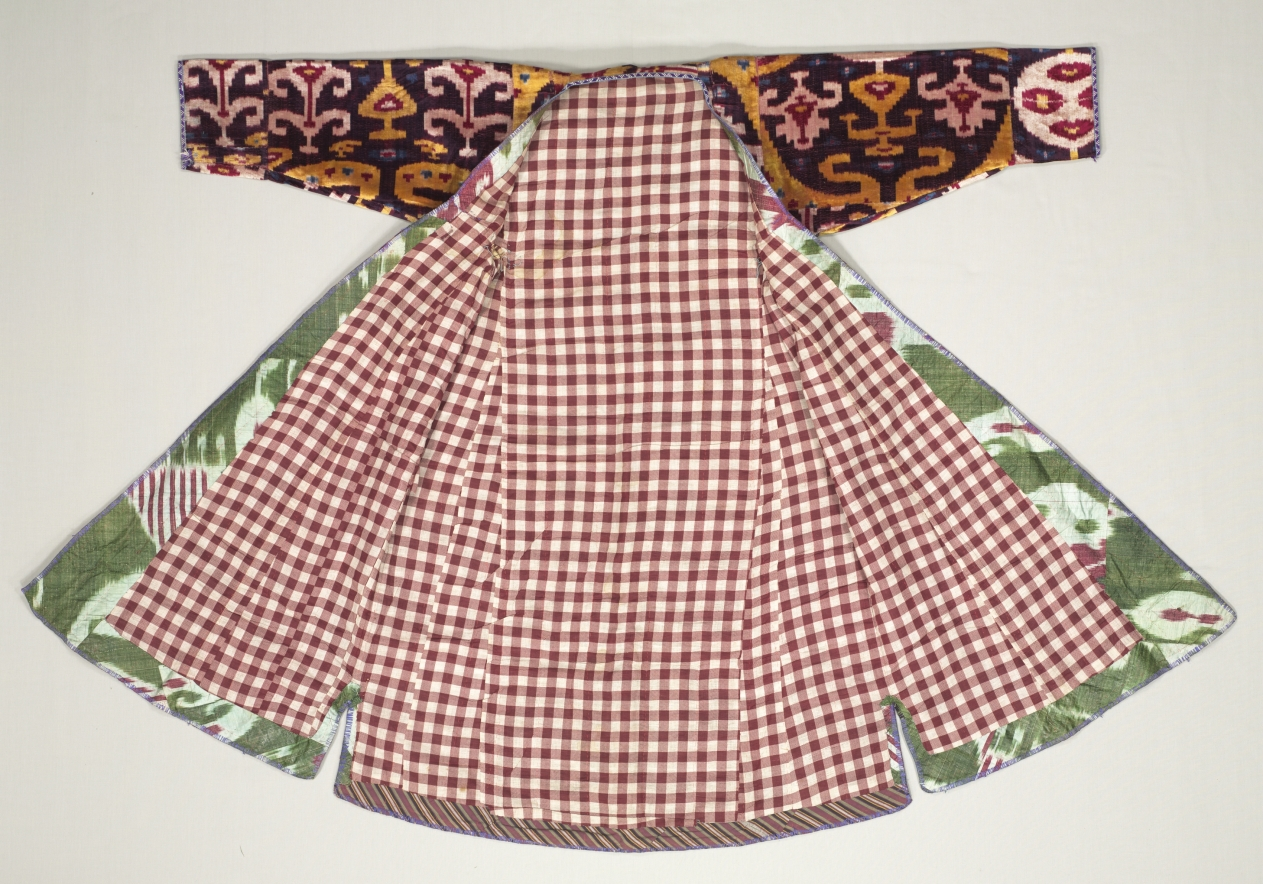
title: Woman’s Robe (munisak)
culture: Uzbekistan, Bukhara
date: 1850–75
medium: Silk: velvet ikat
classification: Garment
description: Dazzling ikat velvet robes, the most sumptuous, expensive, and prestigious type of ikat, were worn throughout Central Asia by men and women. This resplendent robe with a V-shaped neckline, fitted torso, and slightly flaring skirt features stylized blossoming plants, pomegranates, and auspicious curved ram’s horns, all with irregular contours of the resist-dye ikat technique. Such female robes were culturally significant in Central Asia. Made for wedding dowries with fabric from the groom’s family, women wore munisaks for rites of passage throughout their lives, as a bride, at family festivals, and funerals.